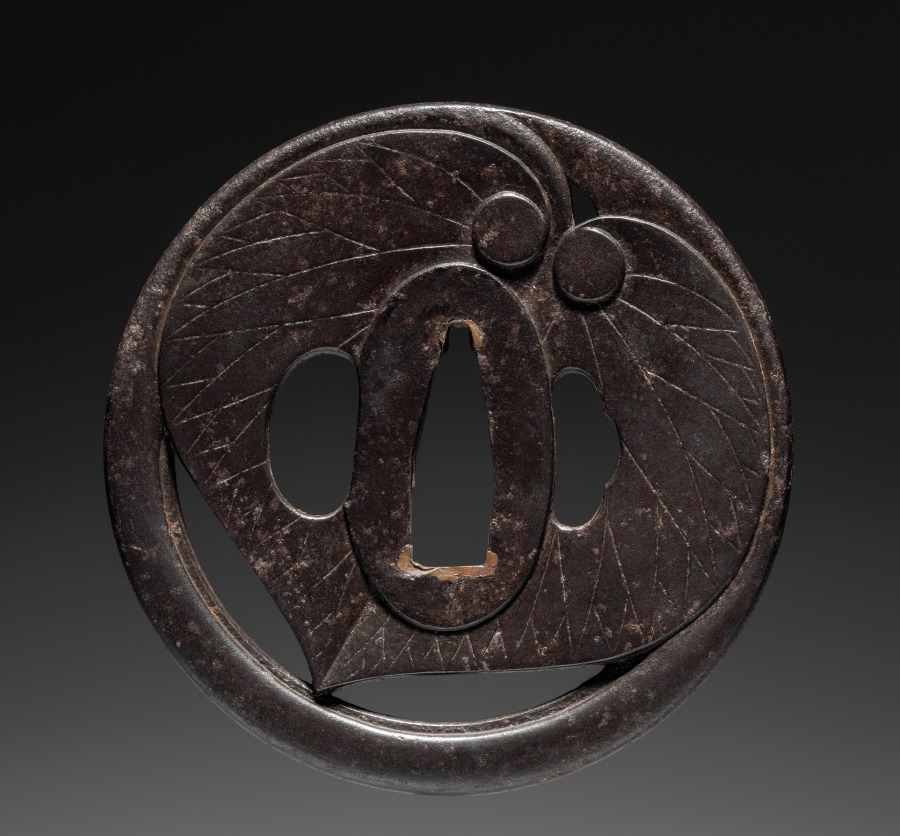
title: Sword Guard (Tsuba) with Hollyhock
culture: Japan, possibly Edo period (1615-1868)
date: c. 1615–1868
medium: iron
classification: Arms and Armor